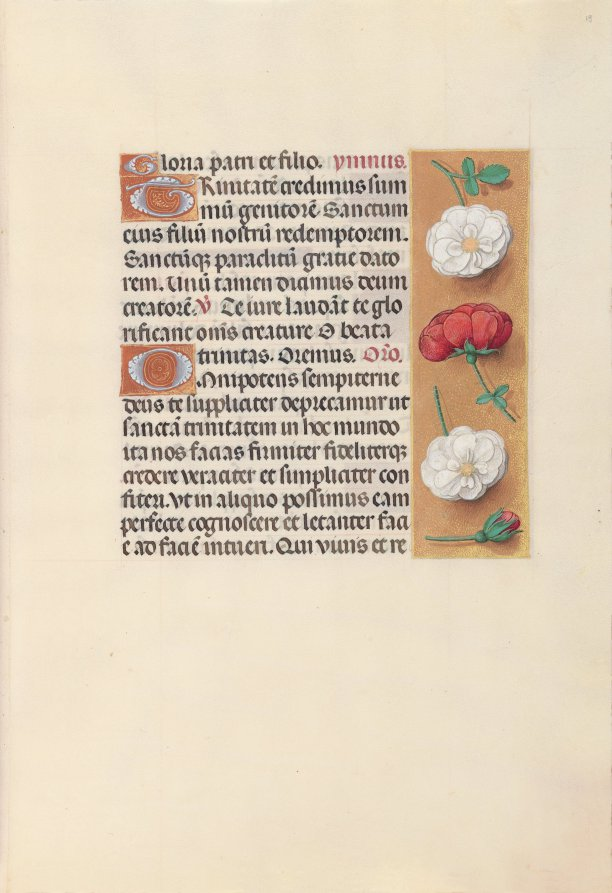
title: Hours of Queen Isabella the Catholic, Queen of Spain: Fol. 19r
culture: Flanders, Ghent and Bruges, late 15th century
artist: Master of the First Prayerbook of Maximillian (Flemish, c. 1444–1519)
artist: and Associates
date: c. 1500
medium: ink, tempera, and gold on vellum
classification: Bound Volume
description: This manuscript was illuminated by a circle of at least five highly organized manuscript painters active in the Flemish cities of Ghent and Bruges. The principal illuminator was Alexander Bening, who painted the majority of the book's miniatures. Manuscripts produced by this circle of artists are renowned for the decoration of their borders, which typically feature a rich variety of realistically-painted flowers, birds, and butterflies. This prayer book, called a book of hours, was intended not for a cleric, but for the private devotions of a lay person-in this case, Isabella the Catholic, Queen of Spain (1451-1504). Isabella's coat of arms embellishes the book's frontispiece. It is unlikely that the book was commissioned by the Queen herself; rather, she probably received it as a diplomatic gift from someone courting her patronage, perhaps Cardinal Francisco Jimenez de Cisneros. A Franciscan friar, Jimenez was dependent upon Isabella for his advancement, first to the post of Queen's confessor in 1492, and then to Archbishop of Toledo in 1495.